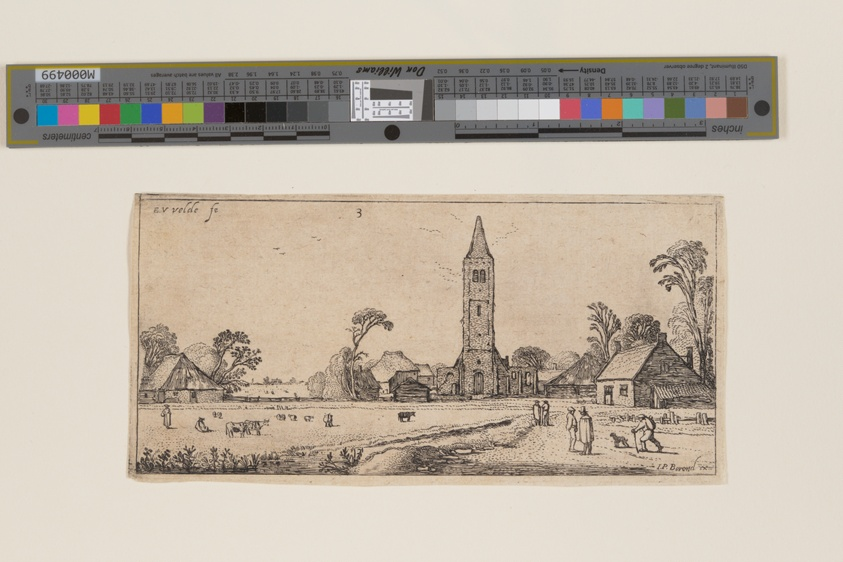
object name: Print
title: Path at Right Leading to a Village, from Landscapes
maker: Esaias van de Velde; Dutch, 1587–1630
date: c. 1610-1630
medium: Etching on ivory laid paper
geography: Netherlands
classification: etching; paper; print; prints and drawing